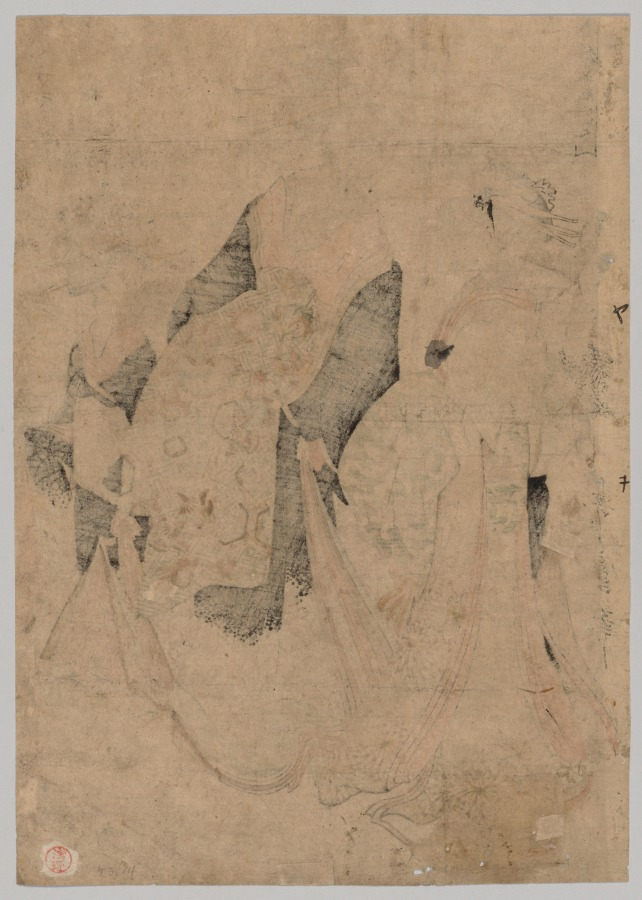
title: Courtesans and Attendants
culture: Japan, Edo period (1615–1868)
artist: Kitagawa Utamaro (Japanese, c. 1754–1806)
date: 1753–1806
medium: color woodblock print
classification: Print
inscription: Signature: Utamaro fude